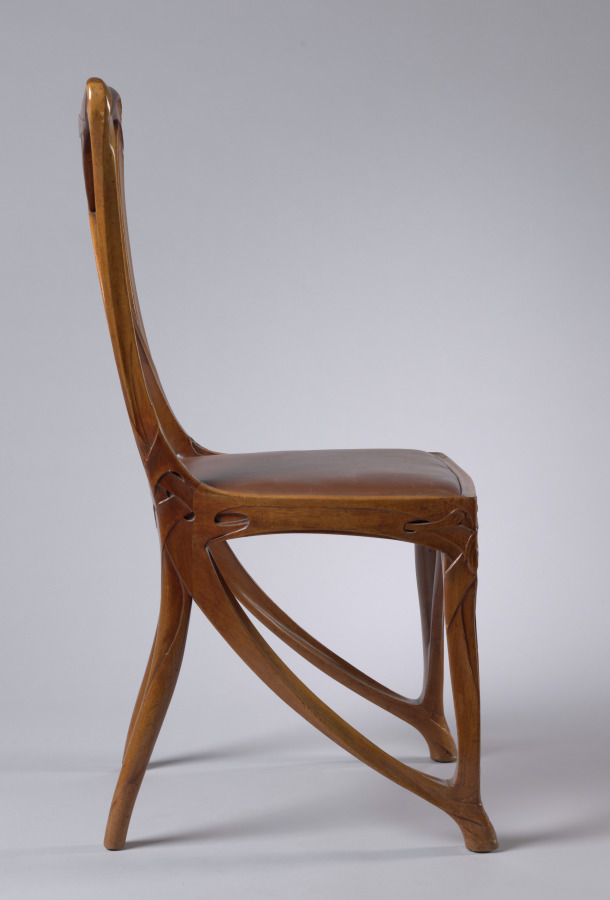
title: Side Chair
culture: France, Paris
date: c. 1900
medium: mahogany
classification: Furniture and woodwork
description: During the 1890s a new style emerged that reflected naturalistic and symbolic motifs found in Japanese and other Asian design. This movement rejected the historicism that had dominated architecture and design during the previous decades and took hold across Europe and America too. In France the style was known as "Art Nouveau," after the name of the gallery belonging to its chief proponent Siegfried Bing, the Maison de L'Art Nouveau (House of the New Art). This side chair typifies Art Nouveau style with its curving lines that seamlessly flow from one to another. This abstract use of curvilinear lines to create form and decoration was one of the major motifs favored by art nouveau designers to evoke naturalistic or organic design. Art Nouveau reached its apex at the 1900 world's fair in Paris, which was intended to herald the new century with a new style of art. However, critics and consumers alike soon rejected Art Nouveau as too sentimental in favor of newer motifs and styles as the moment passed. By 1905 it was all but forgotten.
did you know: This chair may have been designed by Parisian cabinetmaker Eugène Gaillard, who created a very similar design for the pavilion of Siegfried Bing at the 1900 world's fair in Paris.